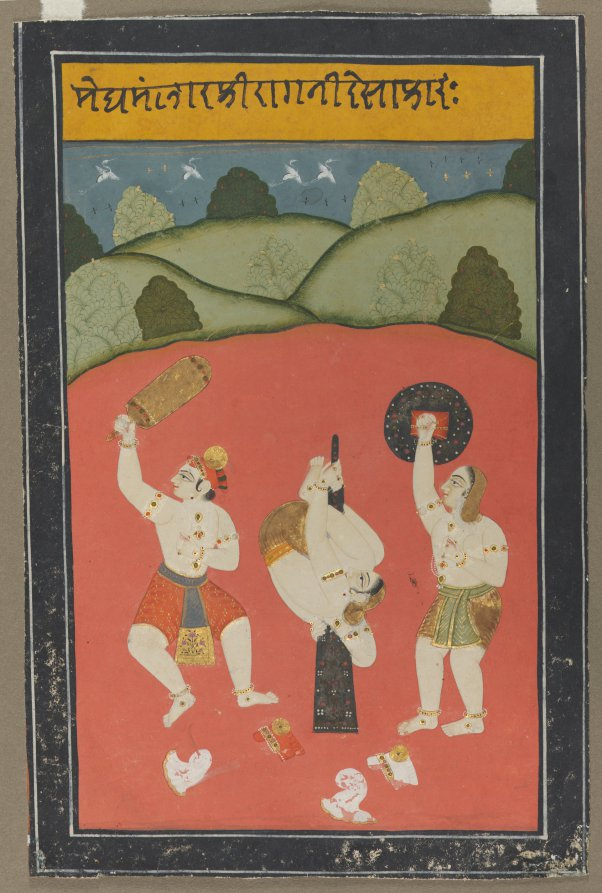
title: Ragini Desakh of Meghamalhar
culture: India, Rajasthan, possibly Raghugarh school, 18th century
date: c. 1770–90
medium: Gum tempera, ink, and gold on paper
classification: Painting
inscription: across top: Meghmallar's Ragini Desakhar